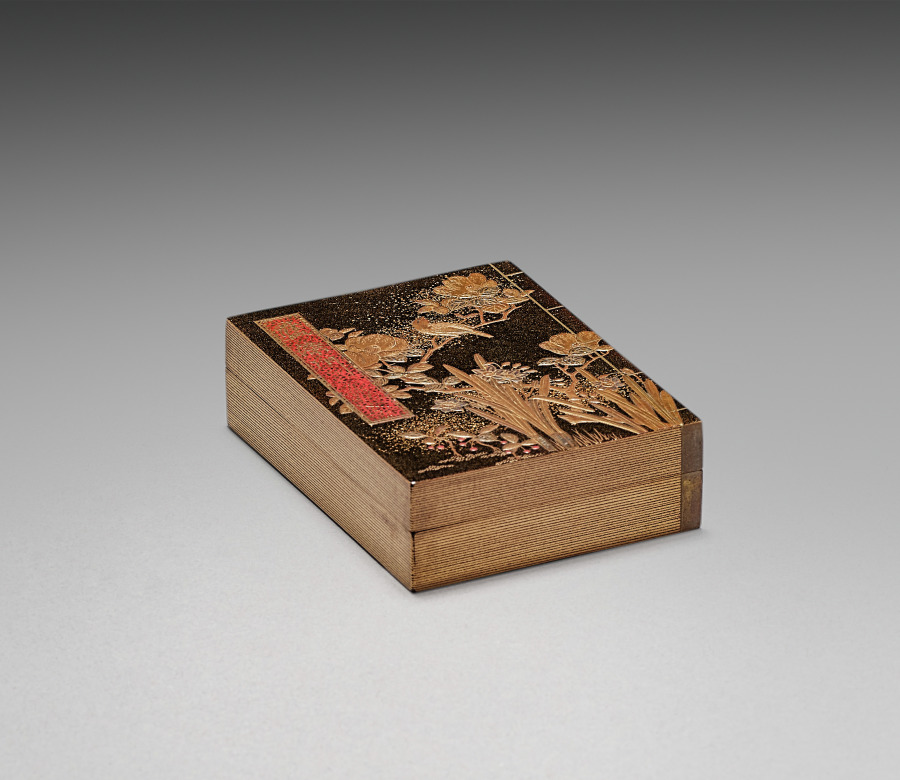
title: Nested Boxes with Chrysanthemums (inner box)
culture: Japan, Meiji period (1868–1912)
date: early 1900s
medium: lacquer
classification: Lacquer